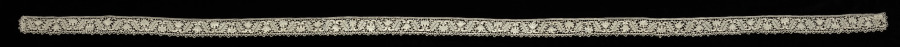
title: Lace Edging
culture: France(?)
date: 1800s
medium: Linen: needle lace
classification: Lace